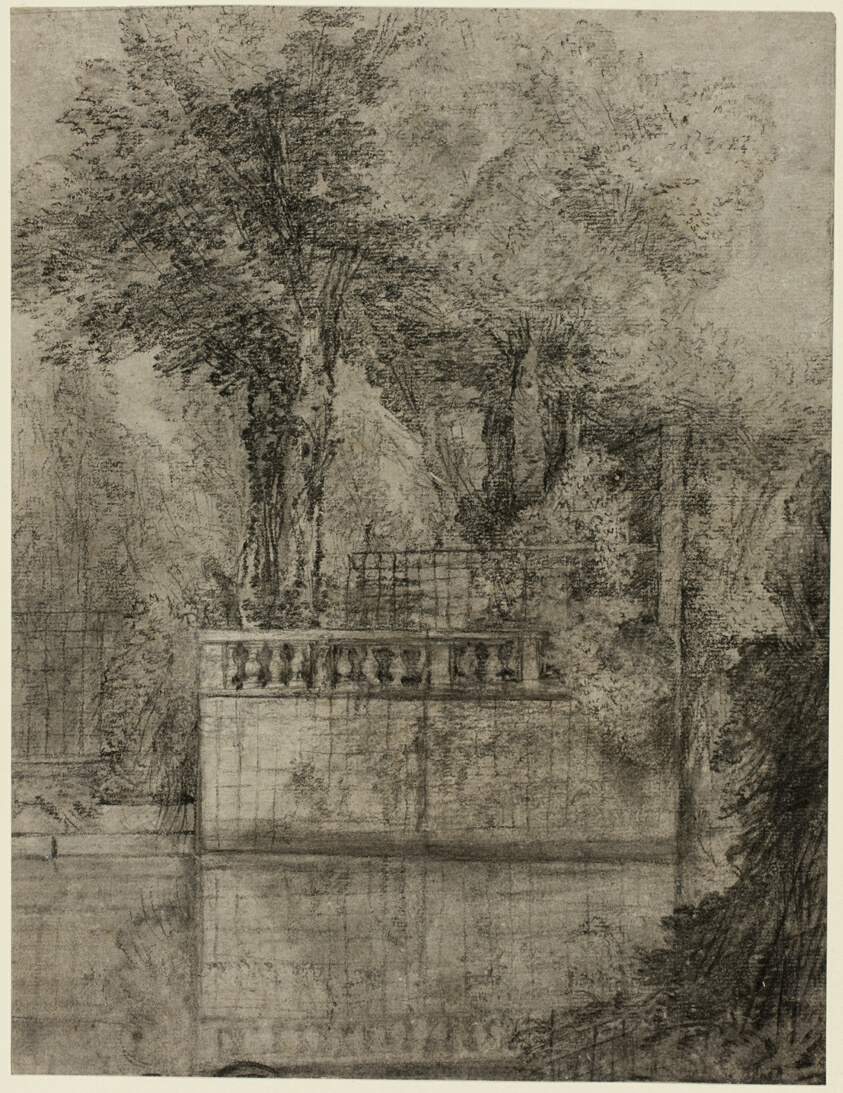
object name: Drawing and Watercolor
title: Lattice Work and Reflecting Pool at Arcueil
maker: Jean-Baptiste Oudry (French, 1686-1755)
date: 1744/47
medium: Charcoal with stumping, and with traces of erasing, on ivory laid paper, laid down on ivory laid paper, perimeter mounted to a cream wove card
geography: France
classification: charcoal; paper; prints and drawing